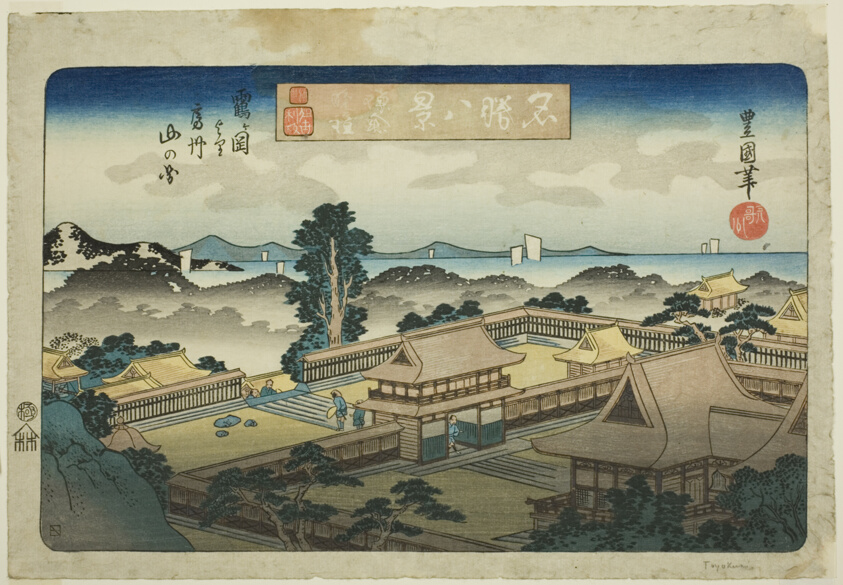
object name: Print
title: Evening Bell at Kamakura, View of the Mountains of Awa Province from Tsurugaoka (Kamakura bansho, Tsurugaoka yori Boshu yama no zu), from the series "Eight Views of Famous Places (Meisho hakkei)"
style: Japanese (culture or style)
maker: Utagawa Toyoshige (Toyokuni II) (Japanese, 1777-1835)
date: c. 1833/34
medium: Color woodblock print; oban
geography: Japan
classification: woodblock print; print; asian art